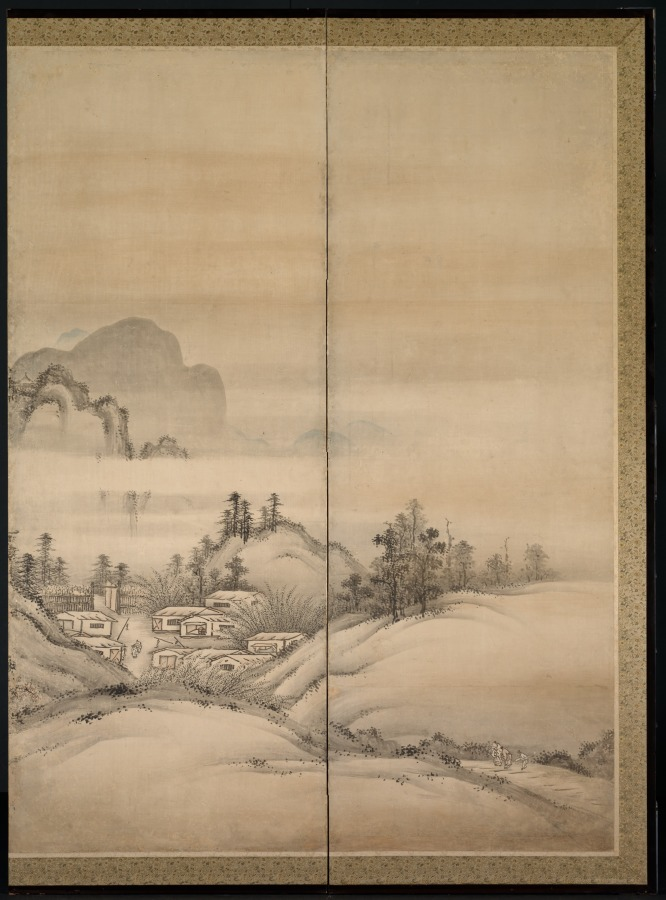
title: Chinese Landscape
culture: Japan, Muromachi period (1392–1573)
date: 1500s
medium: One of a pair of six-fold screens; ink and slight color on paper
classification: Painting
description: In a panorama of mountains and expanses of water, three gentlemen have assembled by moonlight to enjoy one another’s company away from a bustling village. An influx of ink paintings from China in both album and scroll formats beginning in the late 1200s inspired Japanese artists to create landscapes based upon Chinese prototypes. Later, Japanese painters adapted the imagery to the larger format of folding screens, which were used to define spaces in large rooms.